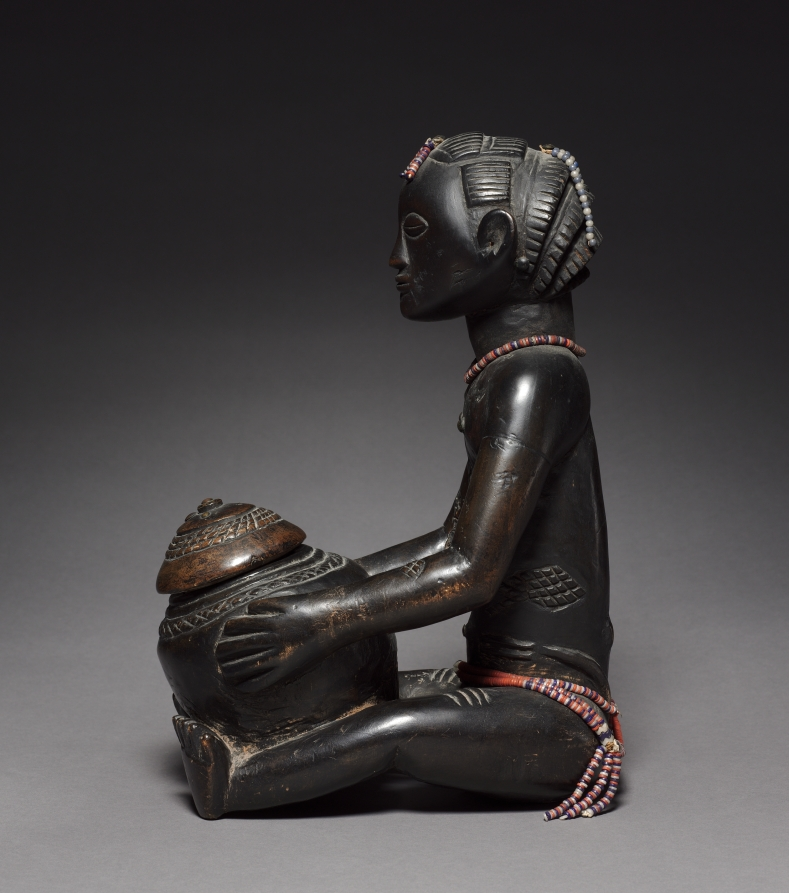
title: Female Bowl-Bearing Figure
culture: Africa, Central Africa, Democratic Republic of Congo, Luba-style carver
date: late 1800s-early 1900s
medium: Wood, glass beads, upholstery studs, plant fiber, and iron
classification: Sculpture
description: In Luba-style art, an object's beauty affects how well it works. While bowl-bearing figures had many possible uses, a royal diviner likely used this well-carved image of a woman carrying a bowl in rituals. Dusty traces of mpemba (white chalk) fleck the shining exterior and the bowl's interior, showing it once held this sacred powder. Diamond-shaped scarification marks at her waist, chest, and back add to her beauty. Her hair is carved into the cascading layered hairstyle worn in the Luba region at the turn of the twentieth century. Strands of imported glass beads encircle her waist and neck, and dangle from her hair. The alternating white and blue beads may symbolize the moon and Mbidi Kiluwe, a culture hero linked to royal practice and smithing. While much Luba-style art depicts women—who are societally important—men created and owned the majority of such works.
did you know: Symbolic of anvils, the round metal tacks decorating the figure's hair "pin" spirits and their secrets within it. They are at the hairline and each of the four hair cascades (the bottommost is now gone).